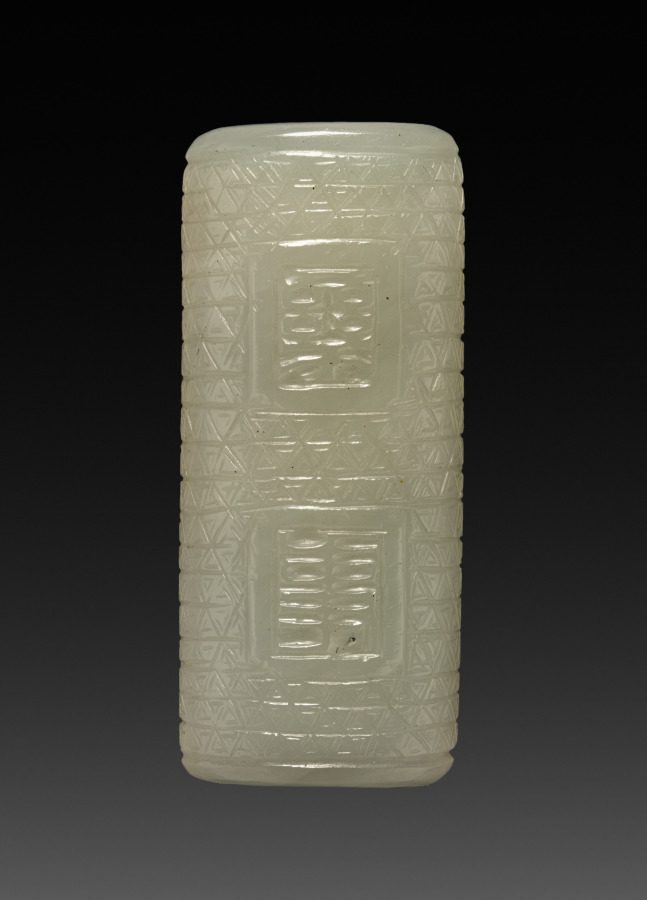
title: Ornament - Bead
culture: China, Qing dynasty (1644–1911), Qianlong reign (1736–95)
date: 1736–1795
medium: jade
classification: Jade